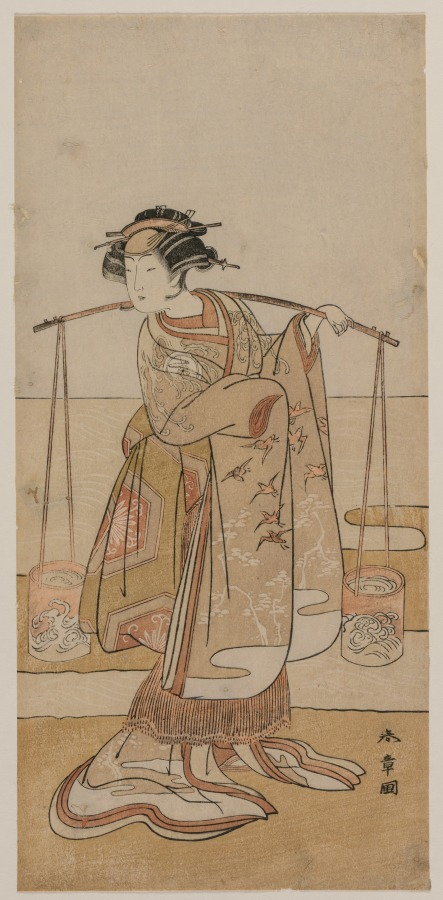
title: Iwai Hanshiro IV as Murasame or Matsukaze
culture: Japan, Edo period (1615–1868)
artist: Katsukawa Shunshō (Japanese, 1726–1792)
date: mid 1770s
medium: color woodblock print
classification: Print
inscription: Signature: Shunsho ga